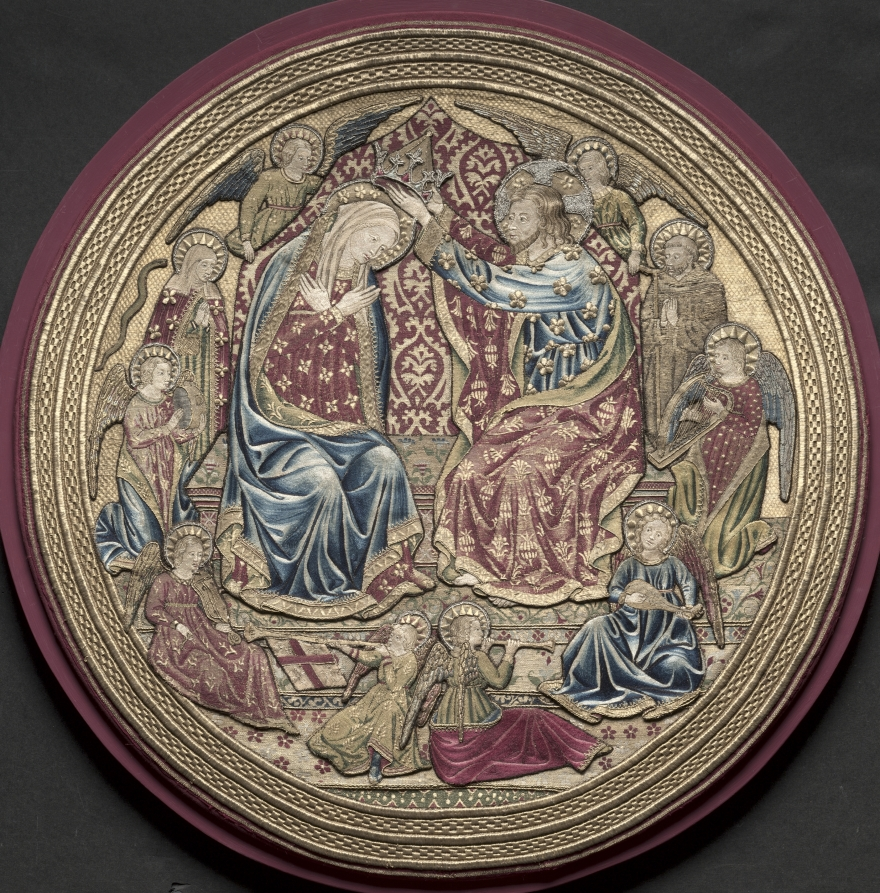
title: Embroidered Tondo from an Altar Frontal: The Coronation of the Virgin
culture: Italy, Florence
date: 1459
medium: Embroidery with gold, silver, and silk thread; split, satin, and couching stitches, or nué (shaded gold)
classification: Embroidery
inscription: the embroidery is backed by an old reused parchment with Latin writing over which in Italian is penned an inscription: "This pallioto was embroidered in the year 1486 by the venerable Margherita del Caccia nun of this monastery. . ." [It is difficult to know to what extent one should rely on this inscription as the style and technique both point clearly to an earlier date.]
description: This masterpiece of Florentine embroidery takes the circular form called a tondo and was likely once attached to an altar frontal. The scene depicts the coronation of the Virgin, the final and culminating event in the narrative cycle of her life. Honoring her as queen of heaven, Christ places the crown on his mother’s head. They are surrounded by eight angels as well as Saints Verdiana and John Gualberto, both much esteemed in Florence, creating a joyous scene. During the Renaissance, Florence emerged as an important center for a specific type of embroidery known as or nué, or shaded gold. This stunning technique used metal and silk threads, as seen here, to create pictures that rivaled paintings. It was frequently used for vestments and altar frontals.